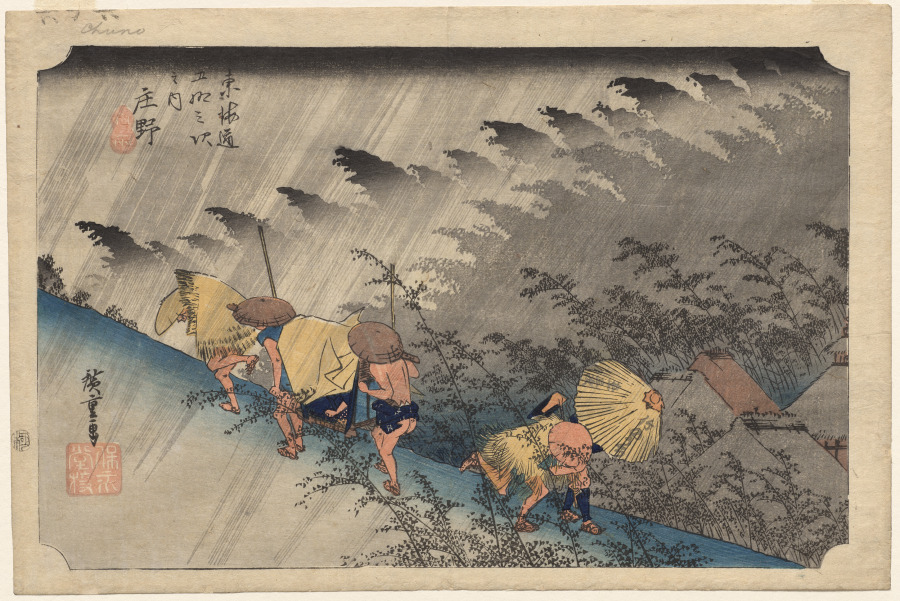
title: Driving Rain at Shōno, from Fifty-Three Stations of the Tokaidō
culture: Japan, Edo period (1615–1868)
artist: Utagawa Hiroshige (Japanese, 1797–1858)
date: 1833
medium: color woodblock print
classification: Print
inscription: Signature: Hiroshige ga. Publisher: Takenouchi Magohachi (Hoeido han). Seal: kiwame.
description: Utagawa Hiroshige’s design for this print captures the atmospheric qualities of rain and its effects on two groups of travelers. Three printing blocks were required to produce the three shades of gray used to suggest distance in the thickets of bamboo in the background. The publisher’s name, “Takenouchi,” and part of the series title, Fifty-Three Stations, are written on one person’s umbrella. Hiroshige created many different print series on the Tokaidō, a road that ran from Kyoto to Edo (now Tokyo). Shōno was a minor way station along this largely coastal route.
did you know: A large red seal with the publisher’s name, Takenouchi, is stamped on the left side of the print.